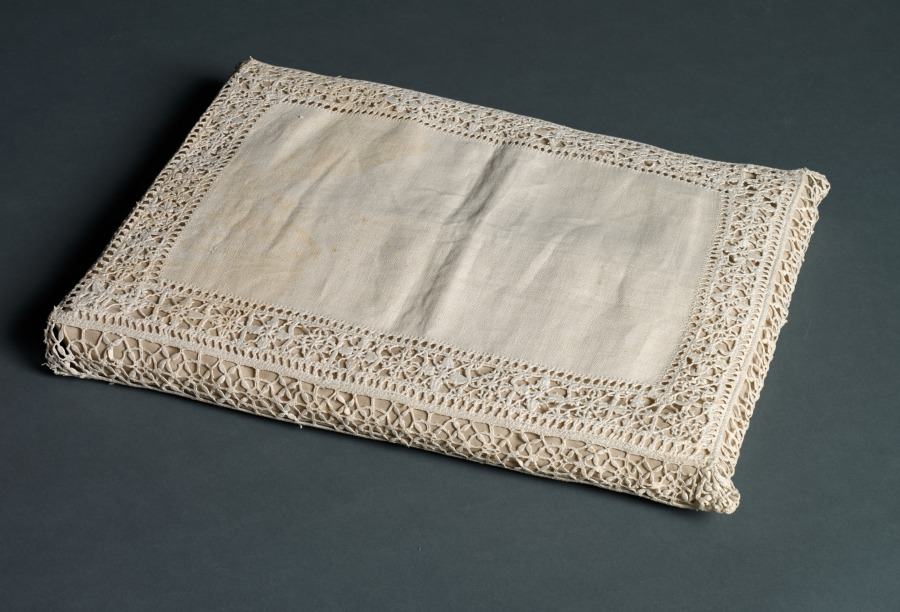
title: Lace Pillow Cover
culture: Italy, Genoa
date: 1600s–1700s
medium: Linen: needle lace (reticella) and bobbin lace edging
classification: Lace